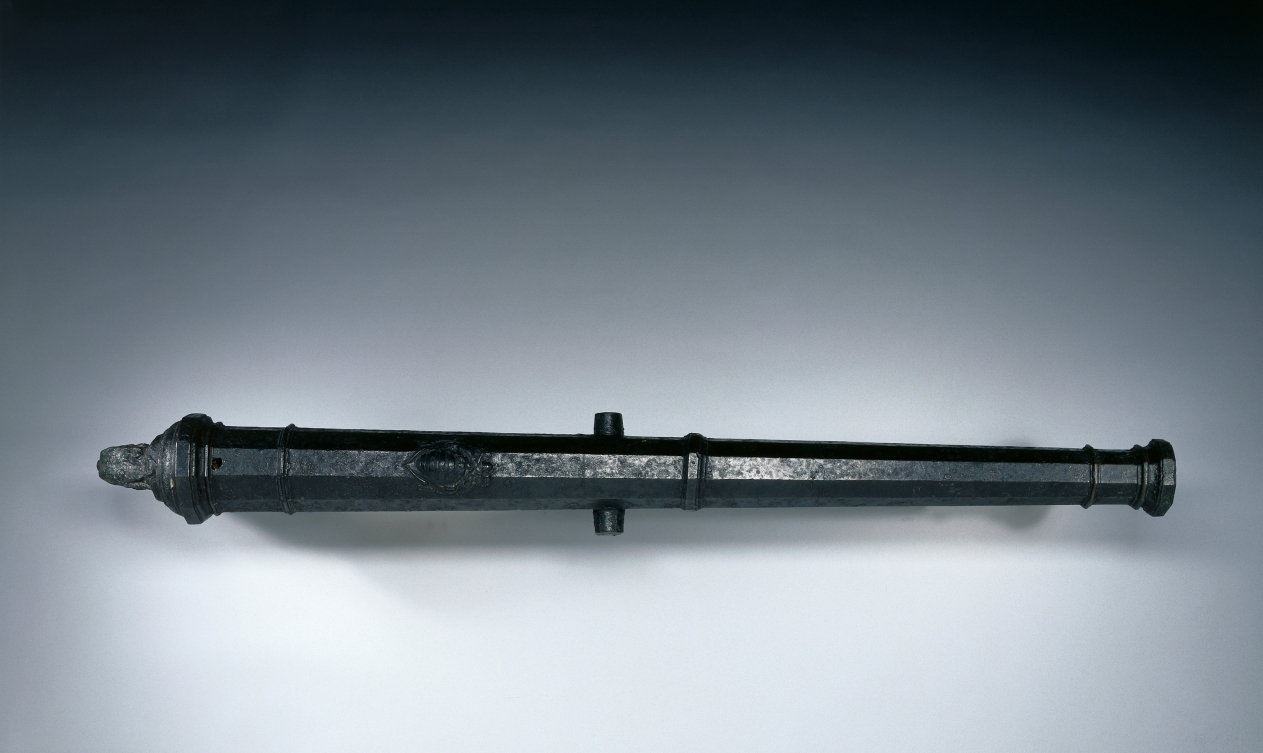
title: Falconet with Arms of Gian Pietro Carafa, Pope Paul IV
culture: Italy, possibly Genoa, 16th century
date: 1555–59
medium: bronze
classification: Arms and Armor